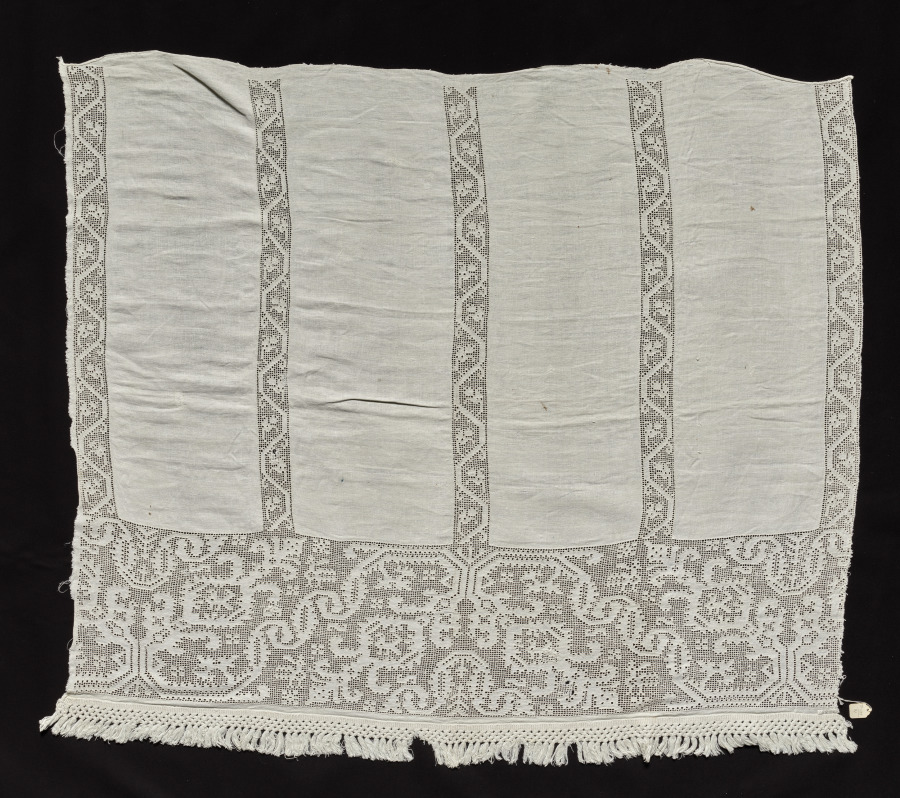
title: Fragment of Lace Cloth or Sheet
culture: Italy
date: 1700s–1800s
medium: Linen: needle lace (drawnwork)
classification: Lace